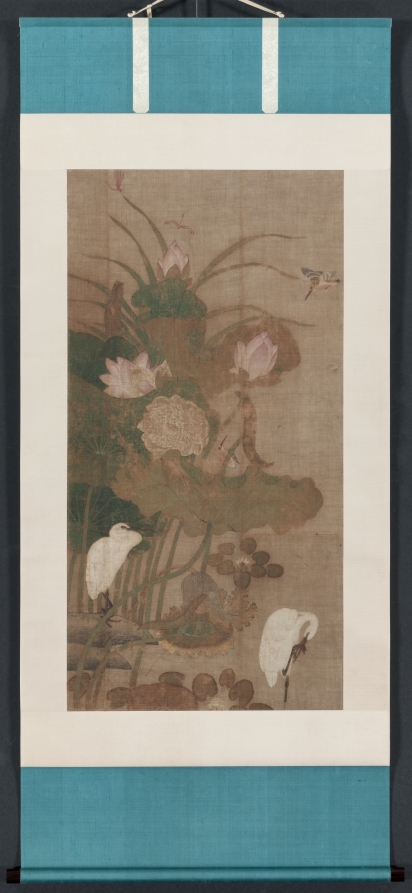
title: Lotuses, Insects, and Birds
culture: Korea, Joseon dynasty (1392–1910)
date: 1800s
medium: hanging scroll; ink and color on silk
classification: Painting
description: Pairs of herons, kingfishers, and dragonflies punctuate a profusion of lotus in this composition that, given the orientation of the herons and the clustering of motifs in the left-hand side of the work, may have once been the left painting of a pair. Given its subject matter, this hanging scroll may have been hung for display during the summer.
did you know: Given its subject matter of lotus flowers, herons, kingfisher, and dragonflies, this hanging scroll may have been hung for display during the summer.